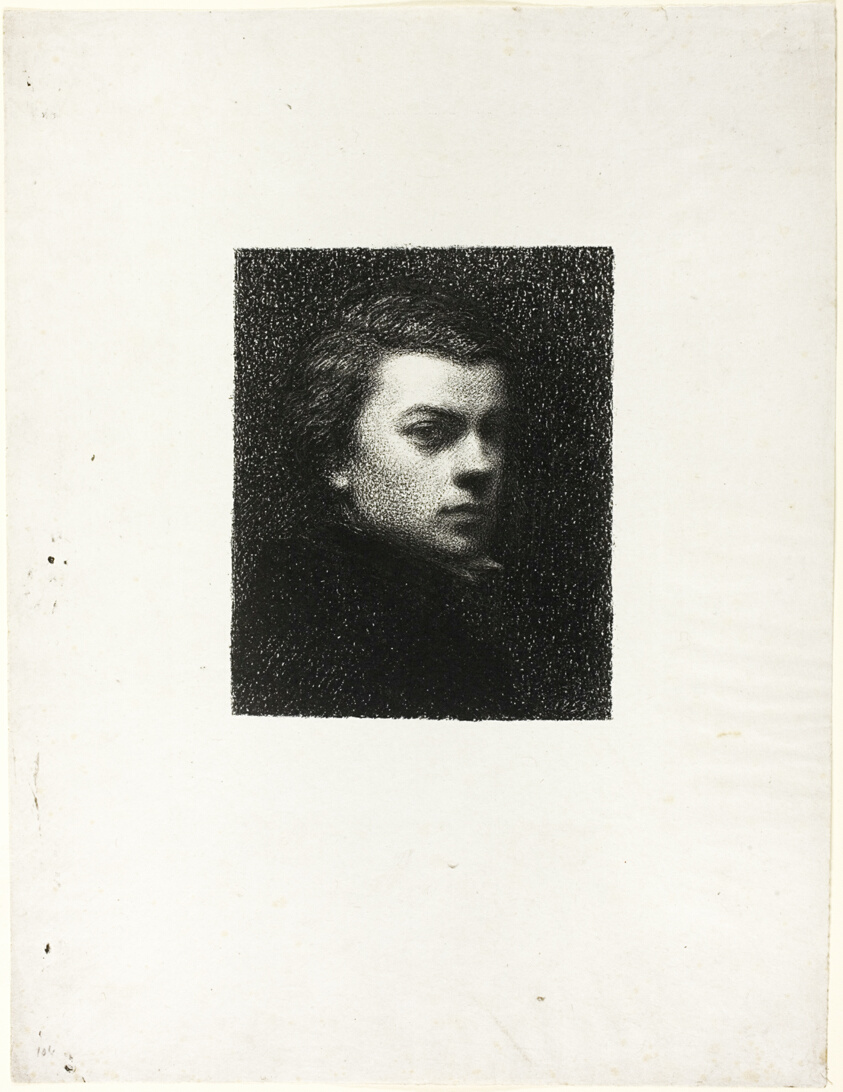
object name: Print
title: Portrait of the Artist at Age Seventeen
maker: Henri Fantin-Latour (French, 1836-1904)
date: 1892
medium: Lithograph in black on light gray chine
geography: France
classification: lithograph; print; prints and drawing